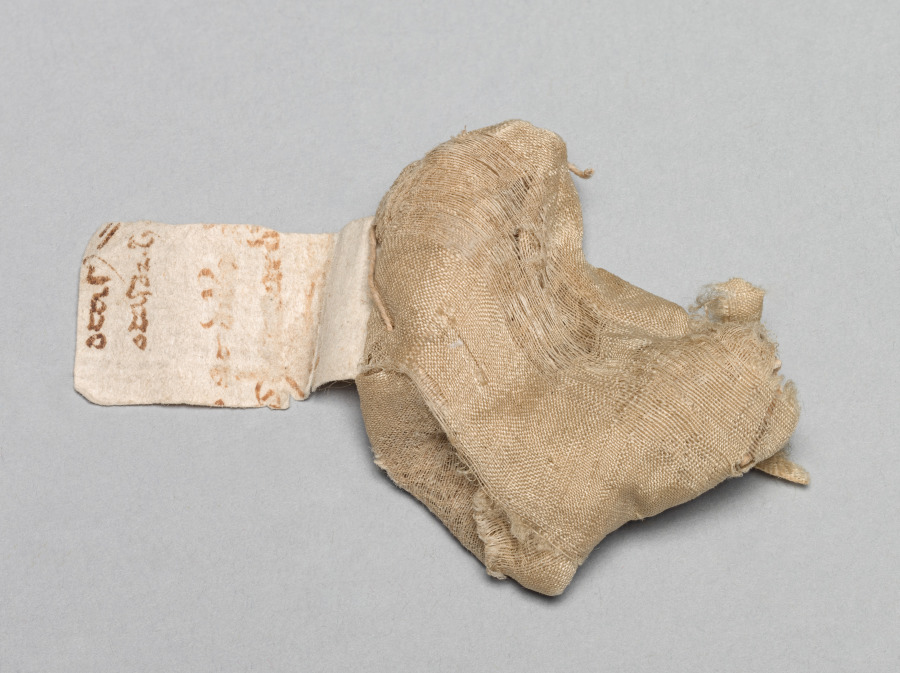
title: Relic of St. Vincent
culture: Germany, Lower Saxony?, Romanesque period, 11th century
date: c. 1045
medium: bone, plain weave undyed silk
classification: Metalwork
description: This relic is housed in the portable altar commissioned by Countess Gertrude of Brunswick, one of the Guelph Treasure’s earliest and most sumptuous objects.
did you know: This bone is a portion of the occipital bone, where the spinal cord connects to the brain.